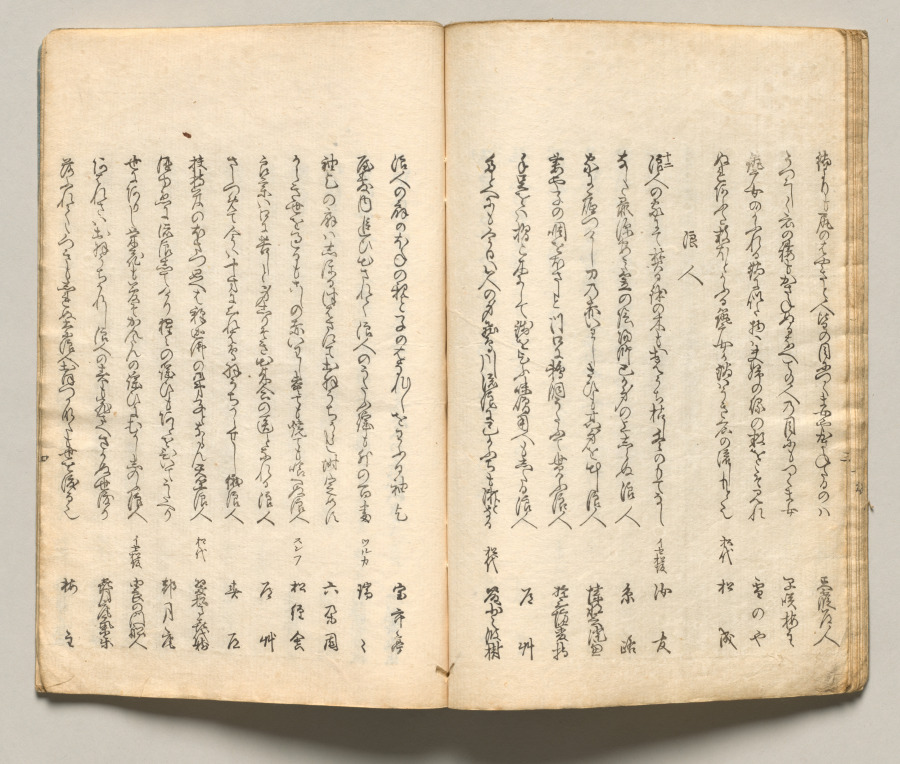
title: Spread Twelve from Volume Seven of People of Japan in Light Verse (Kyōka)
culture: Japan, Edo period (1615–1868)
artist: Utagawa Hiroshige (Japanese, 1797–1858)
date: 1857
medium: Woodblock-printed book; ink and color on paper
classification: Bound Volume